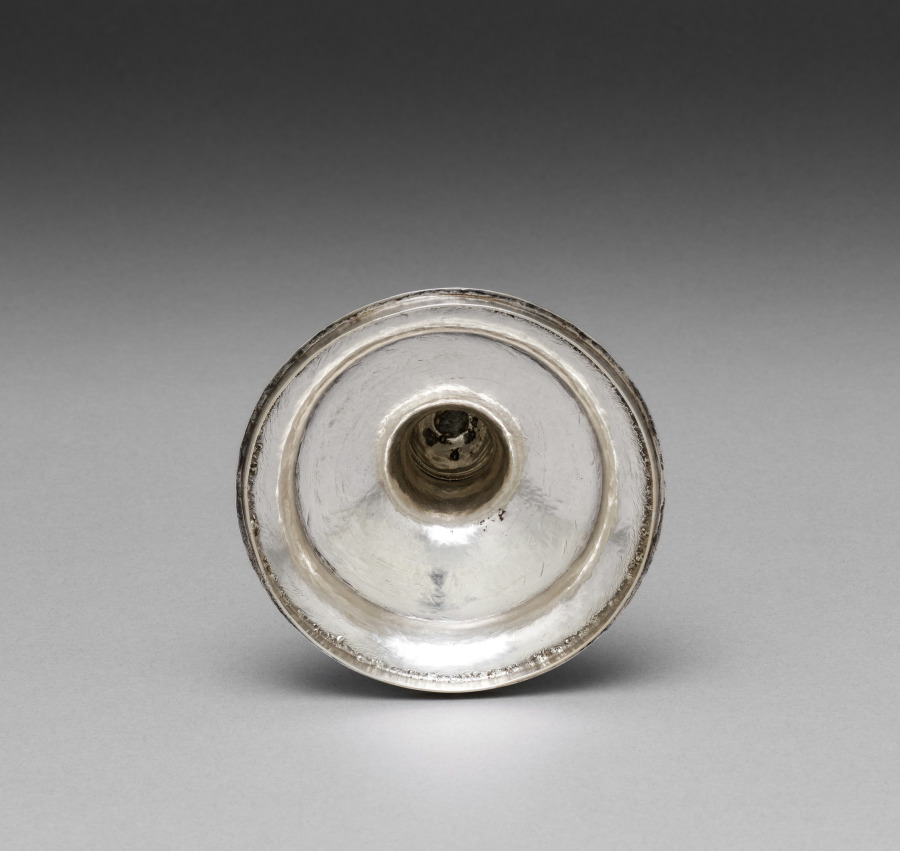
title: Cover for a Sugar Bowl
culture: America, Pennsylvania, Philadelphia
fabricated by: William Haverstick (American, 1756–1823)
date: c. 1800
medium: silver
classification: Silver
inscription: engraved "MP" in bright-cut script on body.